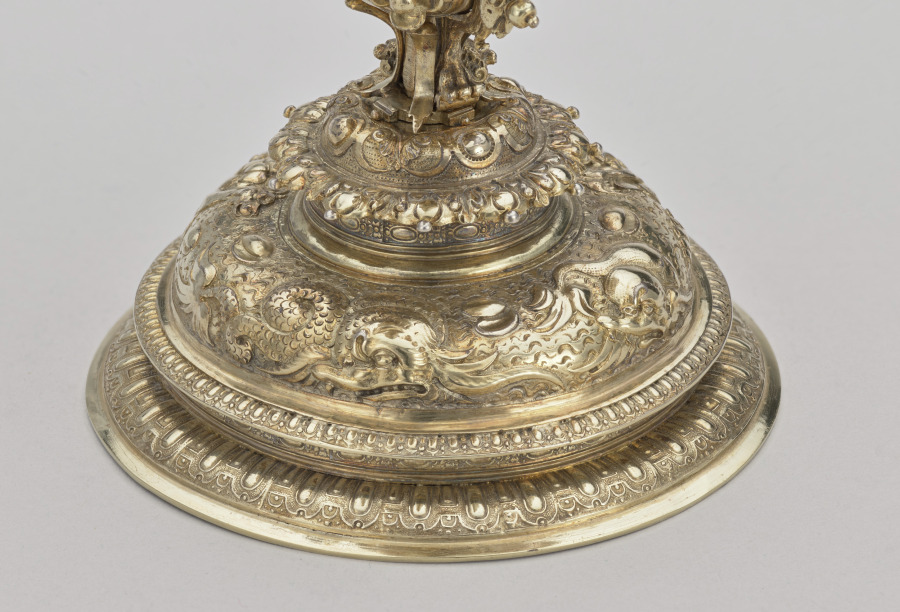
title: Nautilus Cup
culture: Netherlands, Holland, Delft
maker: Cornelis Jansz van der Burch (Dutch, active in Delft, d. 1615)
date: 1607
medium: Silver-gilt, nautilus shell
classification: Metalwork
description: Nautilus shells were brought to the Netherlands from Indonesia. Skilled Dutch silversmiths mounted them in silver, creating luxurious vessels that were sought after by wealthy collectors. Early Dutch nautilus cups are mainly associated with the city of Delft, although only a few other examples made in Delft are known from the late sixteenth and early seventeenth centuries. They feature the dramatic motif of a sea monster’s head.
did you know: The nautilus is a marine mollusk that swims by expelling water from its shell using jet propulsion.